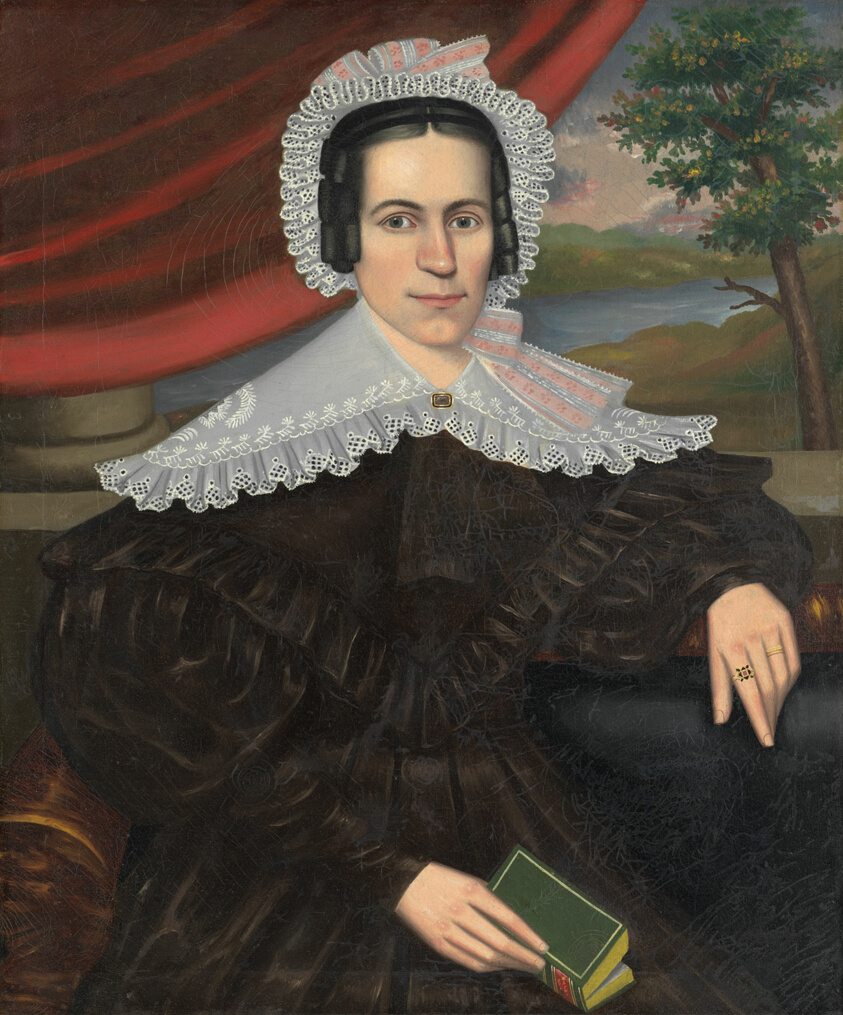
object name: Painting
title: Woman with a Green Book (Louisa Gallond Cook)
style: Folk Art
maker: Erastus Salisbury Field (American, 1805–1900)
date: 1838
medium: Oil on canvas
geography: United States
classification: painting; american arts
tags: fashion, people, portraits